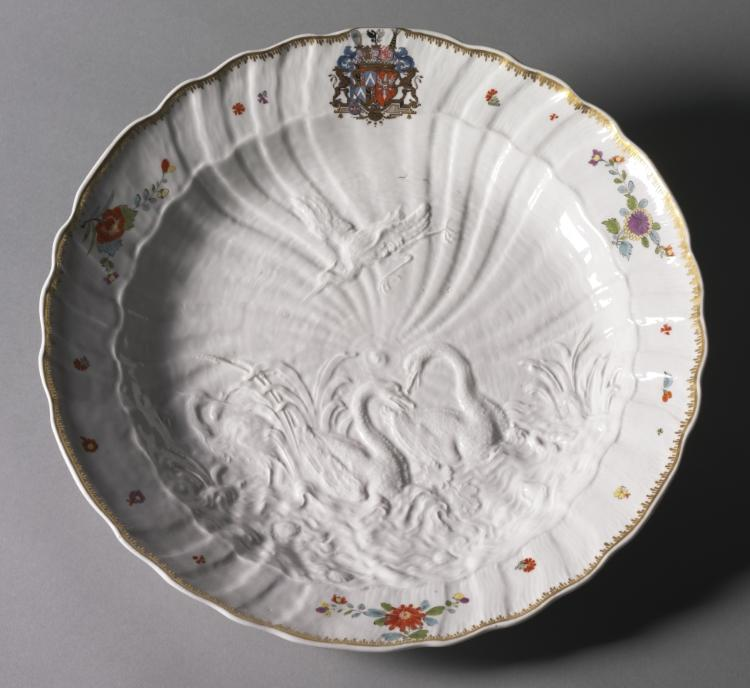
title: Plate from the Swan Service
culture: Germany, Meissen, 18th century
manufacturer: Meissen Porcelain Factory (German, est. c. 1710)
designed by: Johann Joachim Kändler (German, 1706–1768)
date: c. 1737–1741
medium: porcelain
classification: Ceramic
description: The Swan service was made for Count Brühl, director of the Meissen factory between 1737 and 1741.